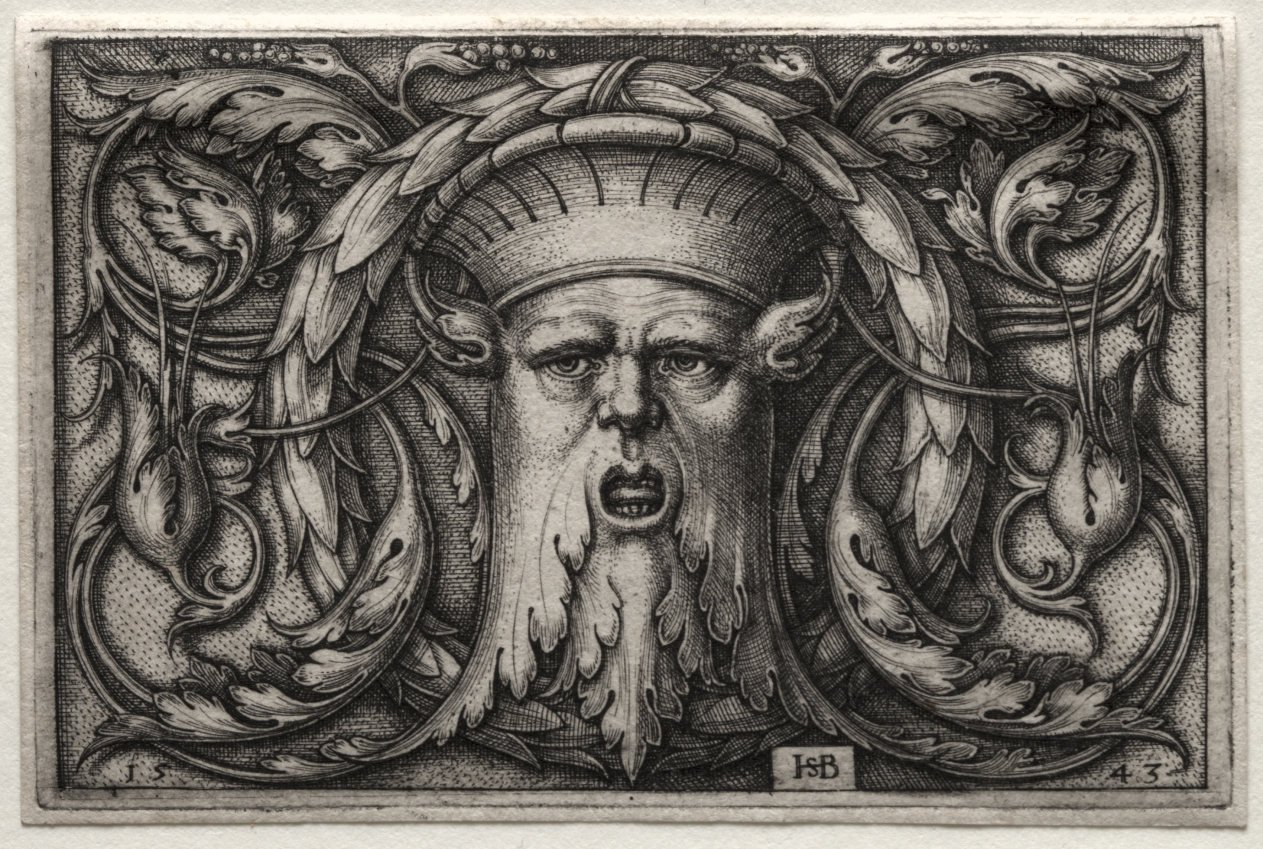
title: Ornament of Satyr's Head and Wreath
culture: Germany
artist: Hans Sebald Beham (German, 1500–1550)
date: 1543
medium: engraving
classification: Print